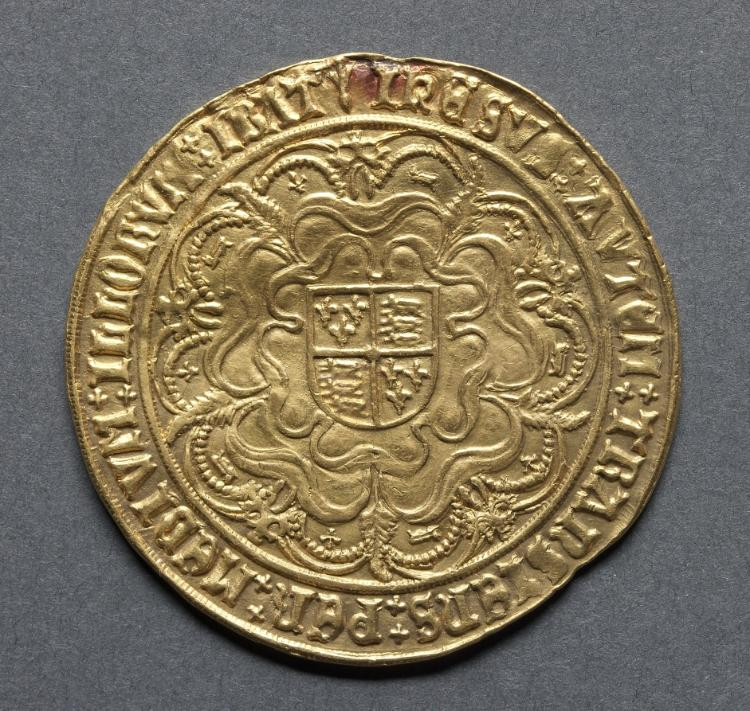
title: Sovereign: Royal Arms on Tudor Rose (reverse)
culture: England, Henry VIII, 1509-1547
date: 1526–1544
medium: gold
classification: Coins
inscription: ihesvs avtem transiens per medivm illorvm ibat